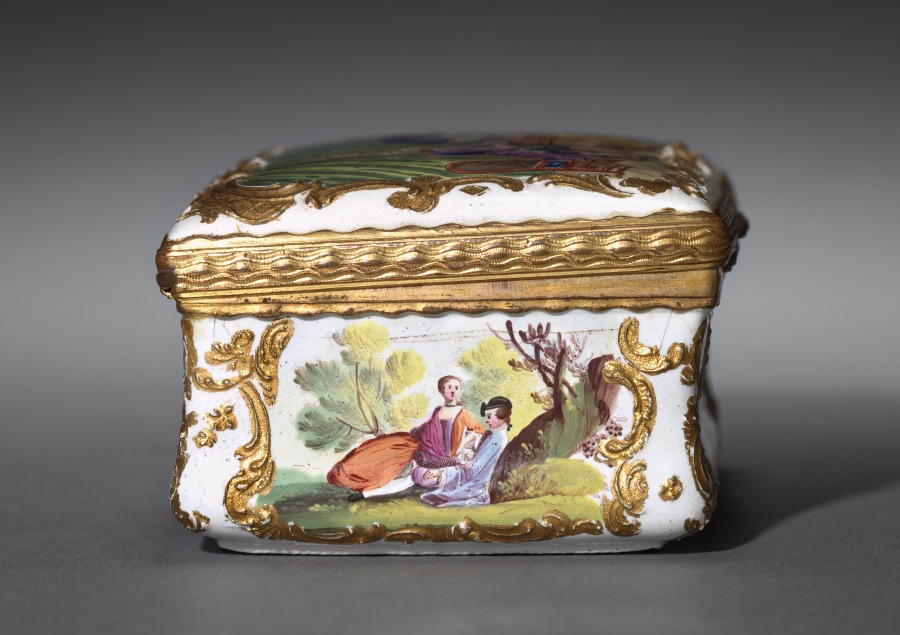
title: Box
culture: England, 18th century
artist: South Staffordshire Factory (British)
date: 1760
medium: enamel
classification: Enamel